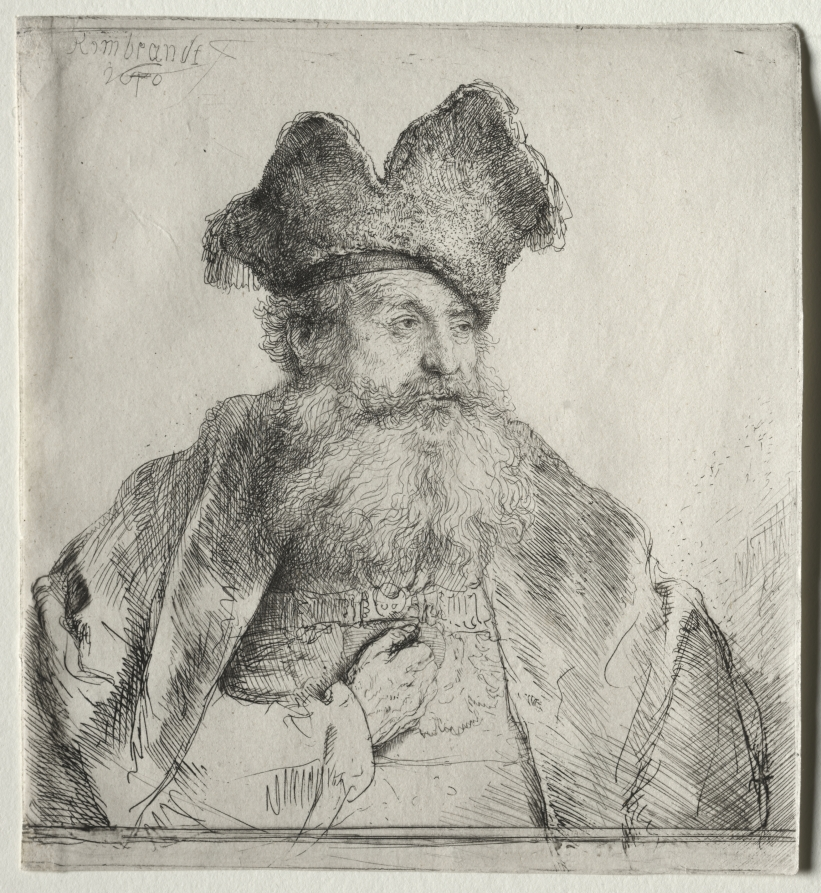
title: Old Man with a Divided Fur Cap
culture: Netherlands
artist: Rembrandt van Rijn (Dutch, 1606–1669)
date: 1640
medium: etching and drypoint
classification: Print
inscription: upper left, in plate: Rembrandt f / 1640 ; VERSO, upper left, in pen and brown ink: 290[underlined] ; upper center, in graphite: N 295 ; lower left, in pen and brown ink: 73[sideways] ; lower left, in graphite: G. L ; lower left, in graphite: f 2:-- / al l ; lower left, in pen and brown ink: 33 ; lower center, in graphite: MK ; lower center, in graphite: K770/c2075 ; lower right, in graphite: 6[underlined]